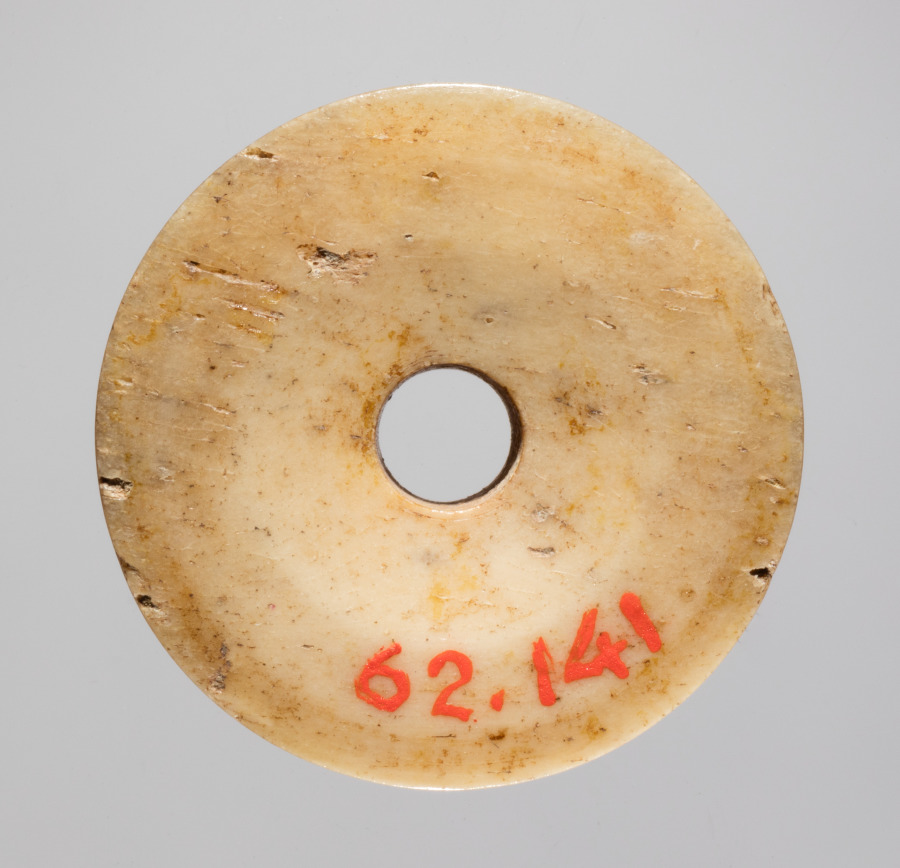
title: Spindle Whorl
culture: Iran, early Islamic period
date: 700s - 900s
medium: bone, incised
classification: Spindle Whorl